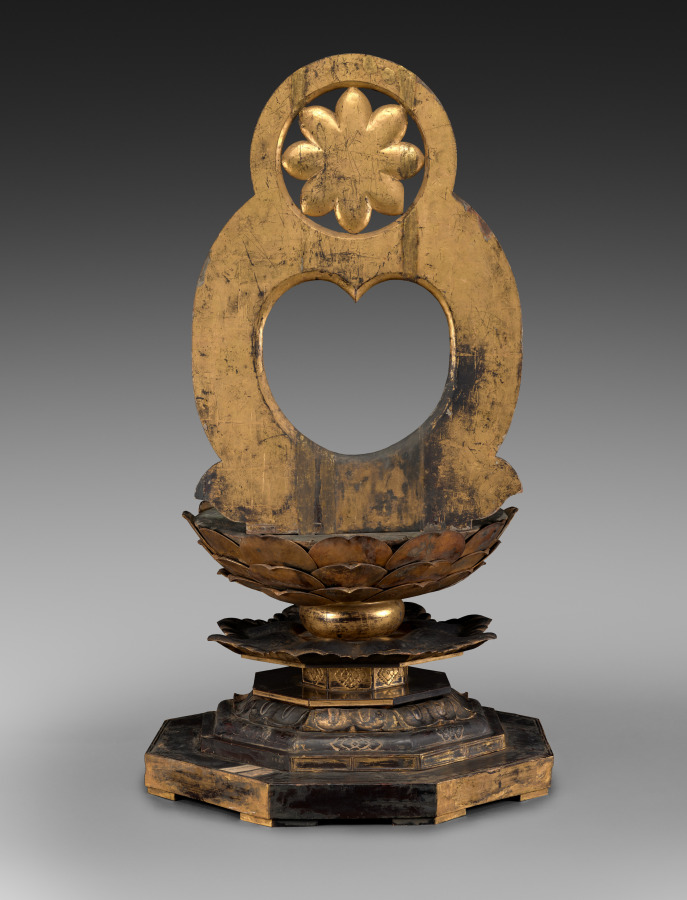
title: Seated Buddha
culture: Japan, Heian period (794–1185)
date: 1100s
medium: gilded wood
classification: Sculpture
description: Composed of a number of hollowed-out pieces of wood that were then covered with lacquer and gilding, this sculpture served as an image of worship in one of the small temples surrounding Kōfukuji, a major Buddhist temple in Nara, Japan. Like many Buddhas, this figure has its right hand positioned in a gesture meaning "fear not." The left hand is a replacement, so its original gesture, a clue to this Buddha's identity, is unknown. However, as the left foot is exposed over the garment, in lotus position, it may have been created as a Medicine Master Buddha, Yakushi Nyorai in Japanese, or the Buddha of our era, Shakyamuni.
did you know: A 1906 photo taken at Kōfukuji shows this sculpture without a halo or left hand.